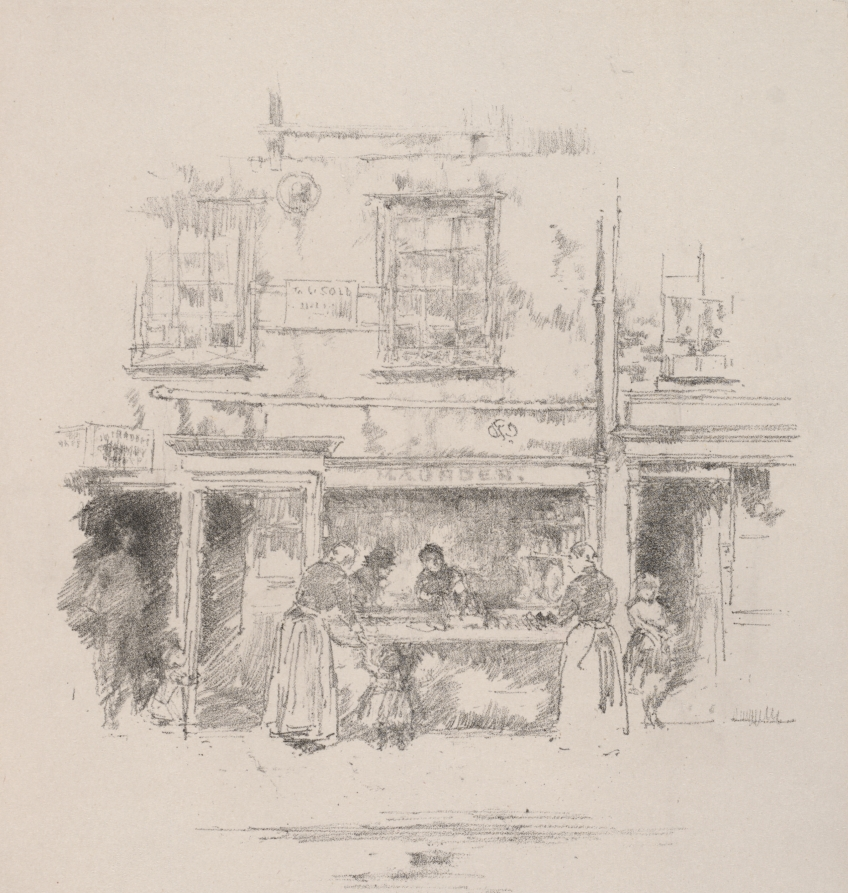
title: Maunder's Fish Shop, Chelsea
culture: America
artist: James McNeill Whistler (American, 1834–1903)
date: 1890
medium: lithograph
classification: Print